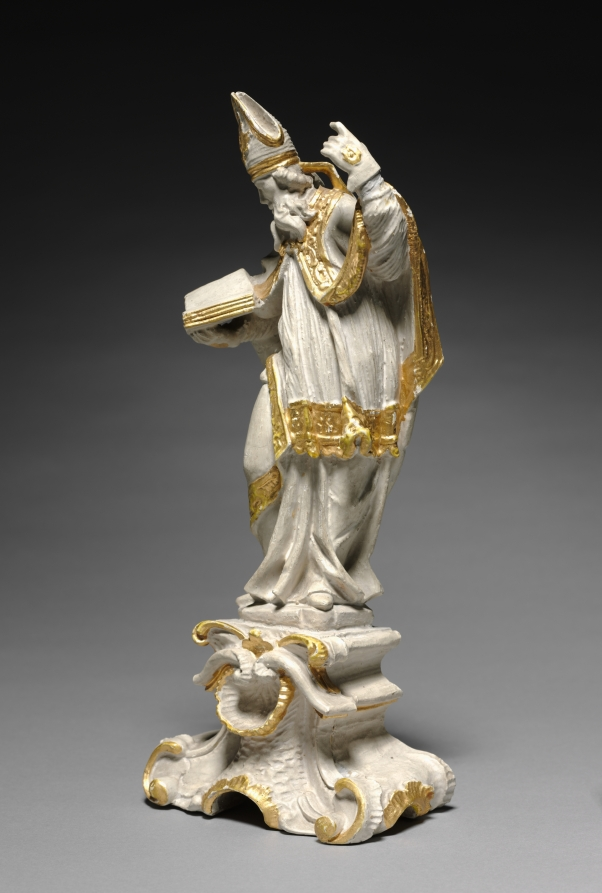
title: Bishop Saint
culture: Germany, 18th century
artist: attributed to Ferdinand Tietz (Austrian, 1708–1777)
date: c. 1740–1750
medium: painted and gilded wood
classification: Sculpture